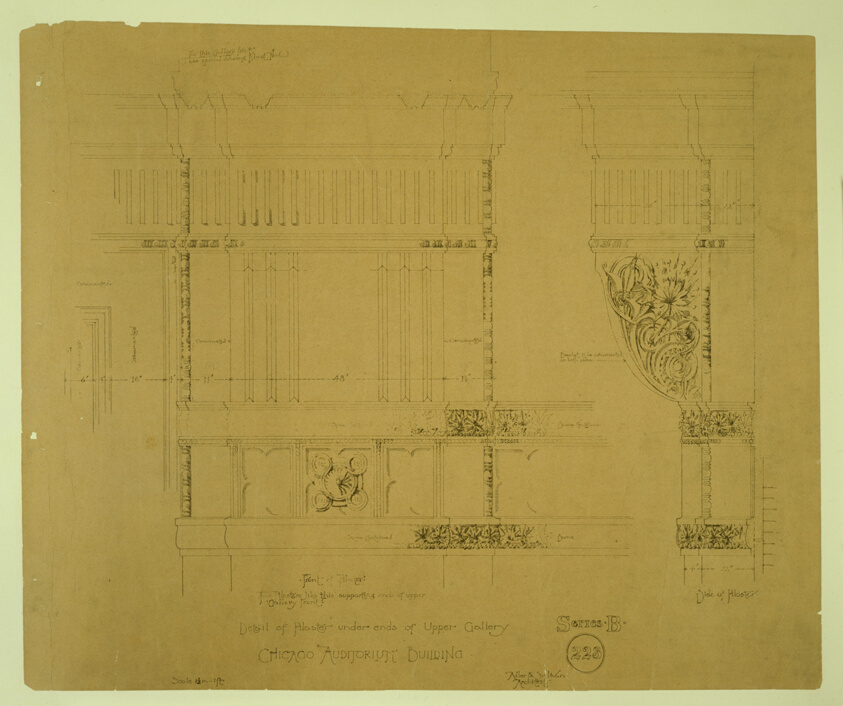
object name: Architectural Drawing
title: Auditorium Building, Chicago, Illinois, Ornamental Plaster Work, Pilaster Details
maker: Adler and Sullivan; American, 1883-1895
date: c. 1887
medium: Hectograph print on paper mounted on board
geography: Chicago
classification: architectural drawing; architecture